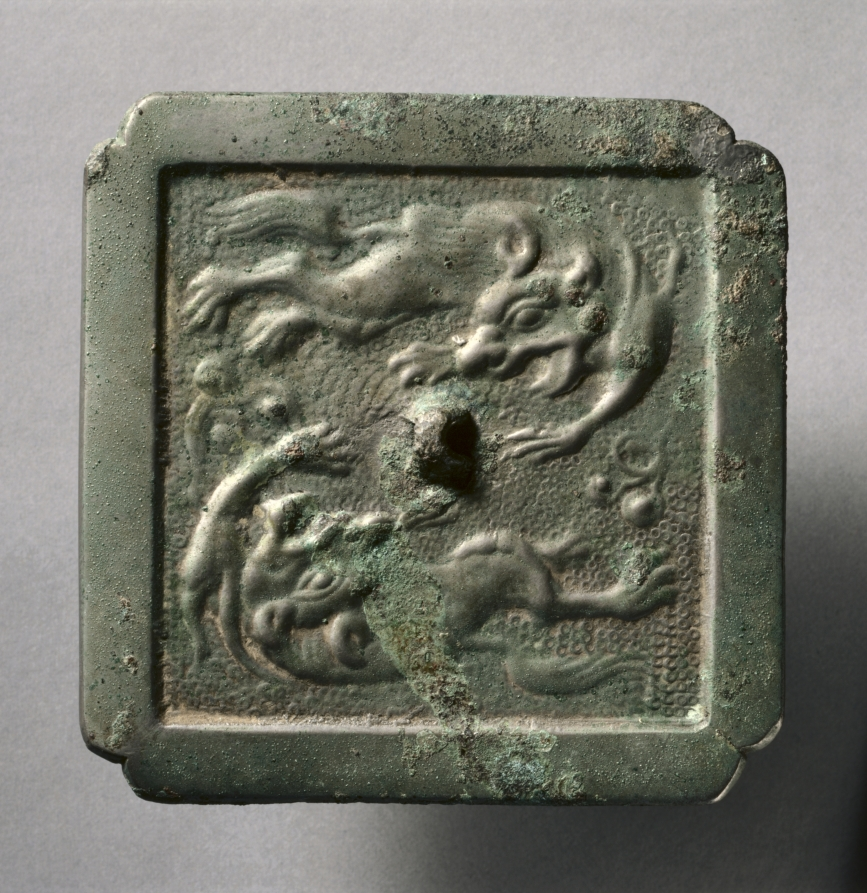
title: Cruciform Mirror with Two Lions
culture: China, Tang dynasty (618-907)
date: late 700s-early 800s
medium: bronze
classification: Metalwork